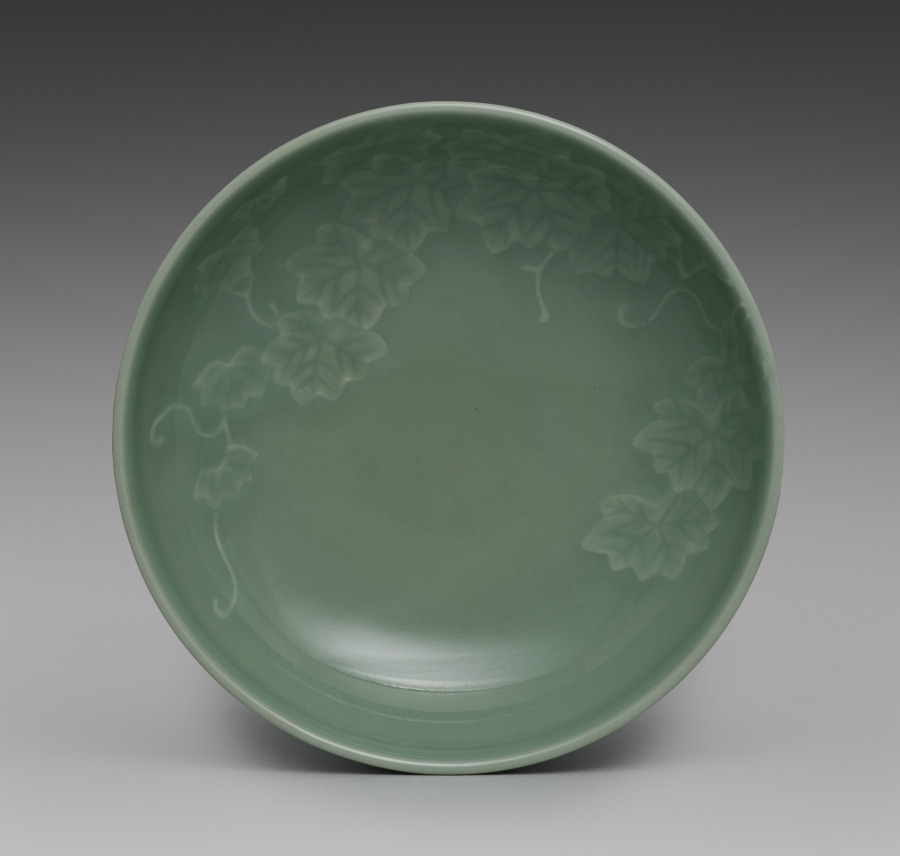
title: Dish from Dishes with Ivy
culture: Japan, Meiji period (1868–1912)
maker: Seifū Yohei III (Japanese, 1851–1914)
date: 1893–1914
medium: One from a set of five dishes; porcelain with green glaze and molded designs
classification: Ceramic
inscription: 清風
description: Yohei III’s main output for his sophisticated clientele was in the form of tea sets and dining sets. He often produced in pairs, sets of five, or sets of ten. This set of five dishes with a green glaze and designs of ivy vines in very low relief has unfortunately lost its box. These dishes are slightly larger than the other dishes, like CMA 2022.187, and so may have been not saucers but rather small plates for meals.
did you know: In his career, Seifū Yohei III created a range of dishes in green glazes.